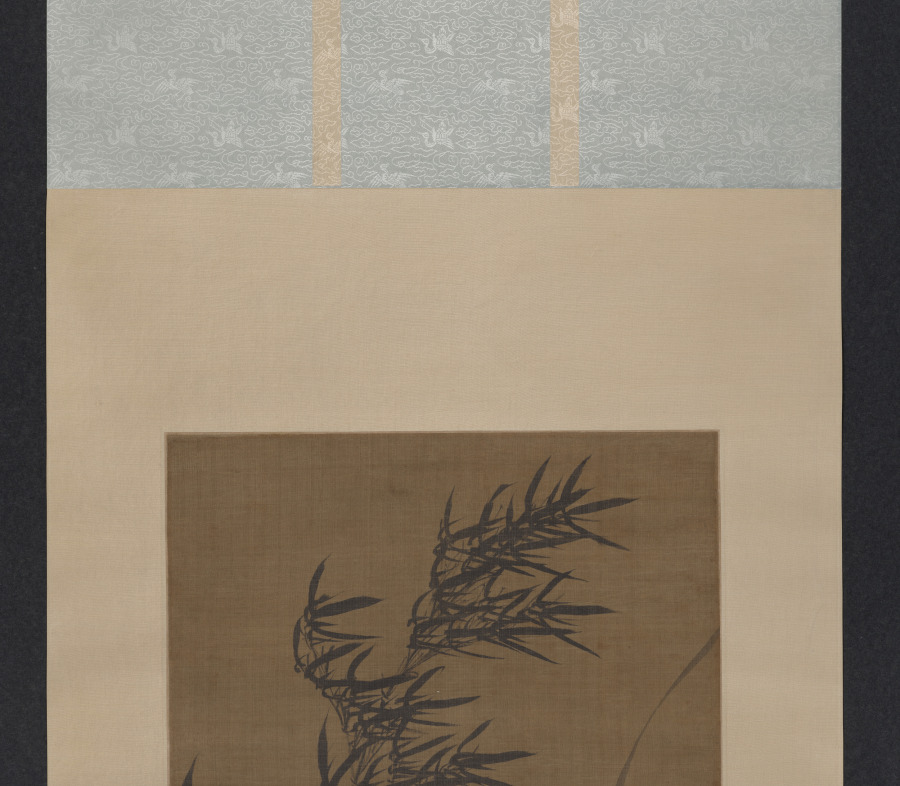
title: Bamboo in the Wind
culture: China, Yuan dynasty (1271-1368)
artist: Puming (Xuechuang) (Chinese, active before 1274-after 1329)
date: 1300s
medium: Hanging scroll; ink on silk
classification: Painting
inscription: Artist's signature and 2 seals, all reading: Xuechuang 雪窓.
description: Bamboo is an evergreen plant that does not break under the weight of snow or the force of the wind, and thus became a favorite motif in literati painting and Chan Buddhism as a metaphor for the virtue of not yielding to worldly temptations. Xuechuang, also known as monk Puming, was a native of Songjiang, near Shanghai, who spent his life as a monk in Suzhou. In 1338, he presided over Yunyan temple on Tiger Hill. Here, he masterfully depicts a bamboo gently bent in a subtle breeze. Puming’s paintings were revered in Japan and Korea.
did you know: Bamboo, pine, and plum, often referred to as the "three friends of winter," are popular motifs in Chinese literati art.